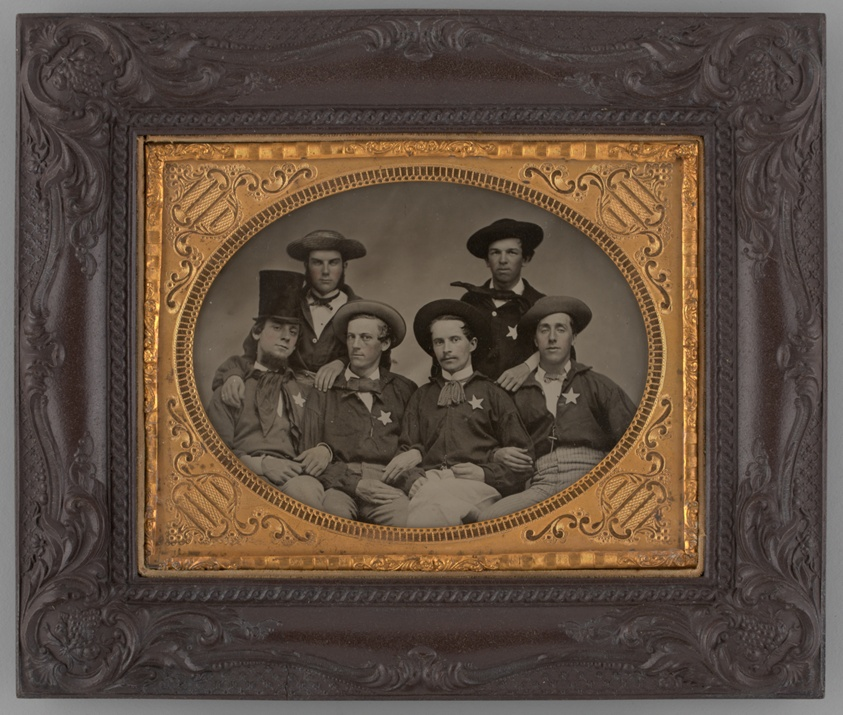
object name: Photograph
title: Untitled (Portrait of Six Men)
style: 19th century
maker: Unknown maker; American, 19th century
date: 1870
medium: Ambrotype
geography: United States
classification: portrait; photograph; photographic process; photography; portrait; ambrotype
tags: lundberg collection, youth, portraits: multiple subjects, portraits: male subject, portrait, men, Male, boys, portraits